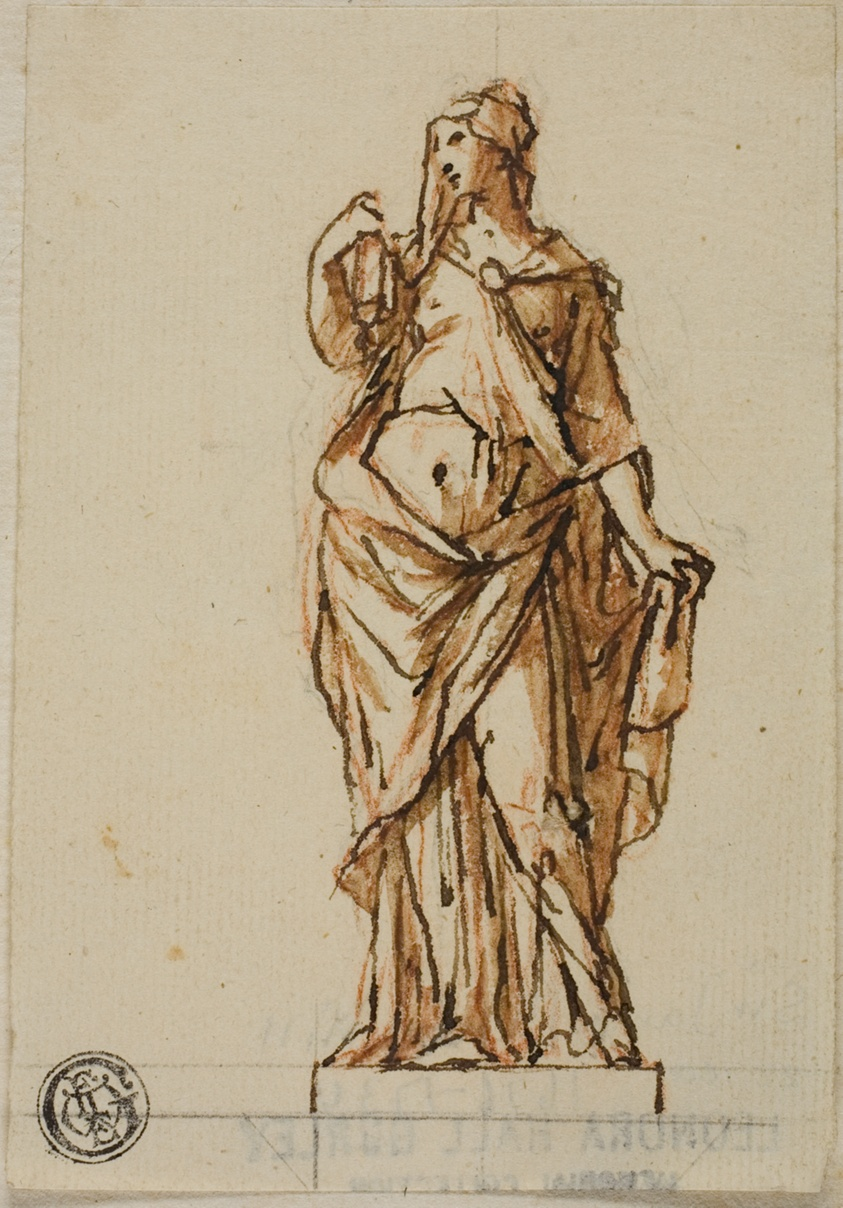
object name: Drawing and Watercolor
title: Project for a Statue: Woman Holding Book with Right Hand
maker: John Michael Rysbrack (Flemish, 1693-1770)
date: 1700s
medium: Pen and brown ink, with brush and brown wash, over red chalk and graphite, on cream laid paper, tipped onto ivory laid paper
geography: Flanders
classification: pen and ink drawings; drawings (visual works); prints and drawing